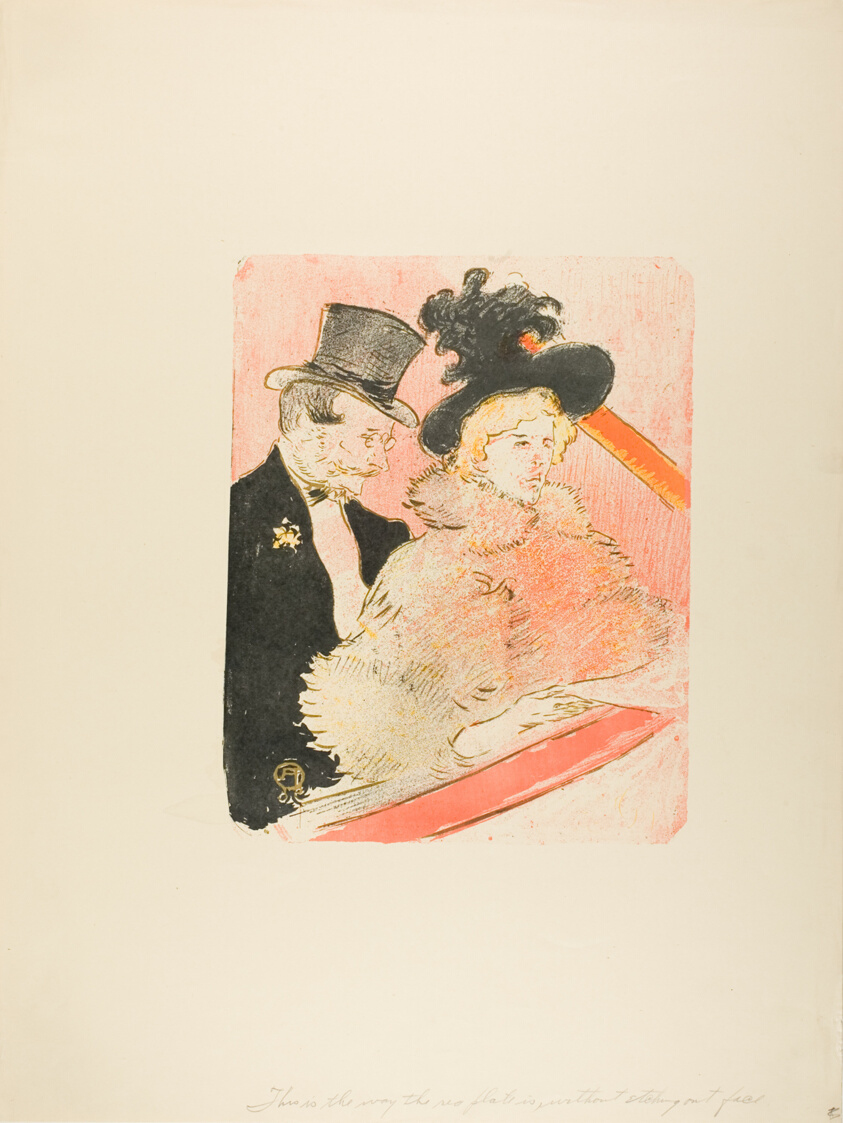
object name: Print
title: At the Concert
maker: Henri de Toulouse-Lautrec (French, 1864-1901)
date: 1896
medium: Color zincograph on cream wove paper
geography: France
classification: zincograph; print; prints and drawing